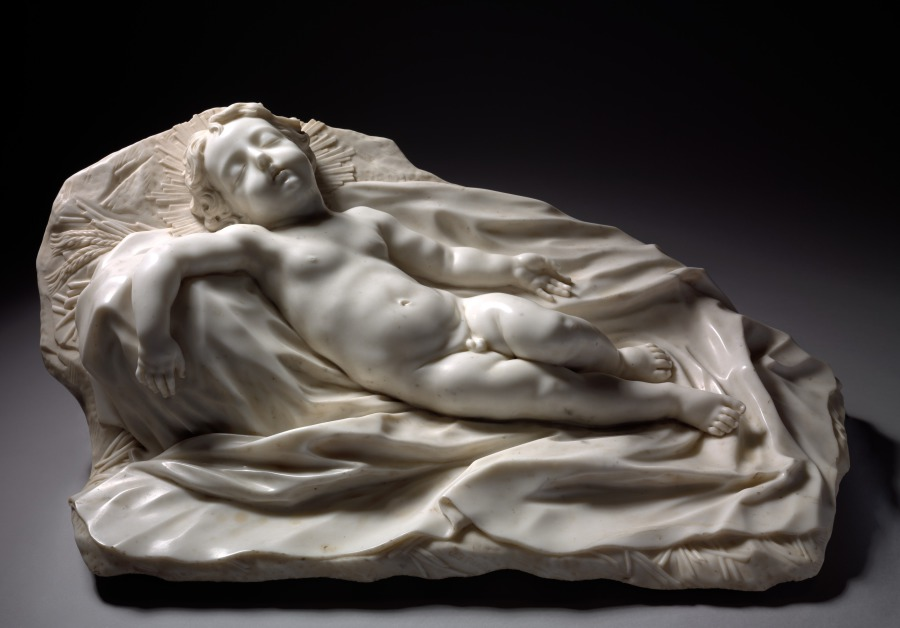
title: Sleeping Christ Child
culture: Italy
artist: Filippo Parodi (Italian, 1630–1702)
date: c. 1675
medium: marble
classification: Sculpture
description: Christ—no longer an infant, but a young child—sprawls on a bed of straw, his head thrown back in slumber and his right arm dangling. The simple radiance framing his head indicates his divinity. Representations of the sleeping Christ child were enduringly popular, not only because of the subject’s inherent charm, but sleep, as a metaphor for death, encouraged pious Christians to meditate on Christ’s humanity and his eventual suffering and death. Filippo Parodi’s Sleeping Christ Child beguiles with lifelike detail. Parodi used varying degrees of polish to differentiate surface textures: Christ’s body is burnished to a soft gleam, while his hair and the straw are more roughly carved, absorbing rather than reflecting the light. Parodi exploited the sensuous and tactile possibilities of the marble to enhance the emotional impact of his piece, a tactic learned from the master of Italian Baroque sculpture, Gianlorenzo Bernini.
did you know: Tender images of the Christ child sleeping encouraged devout Christians to meditate on Christ’s humanity.